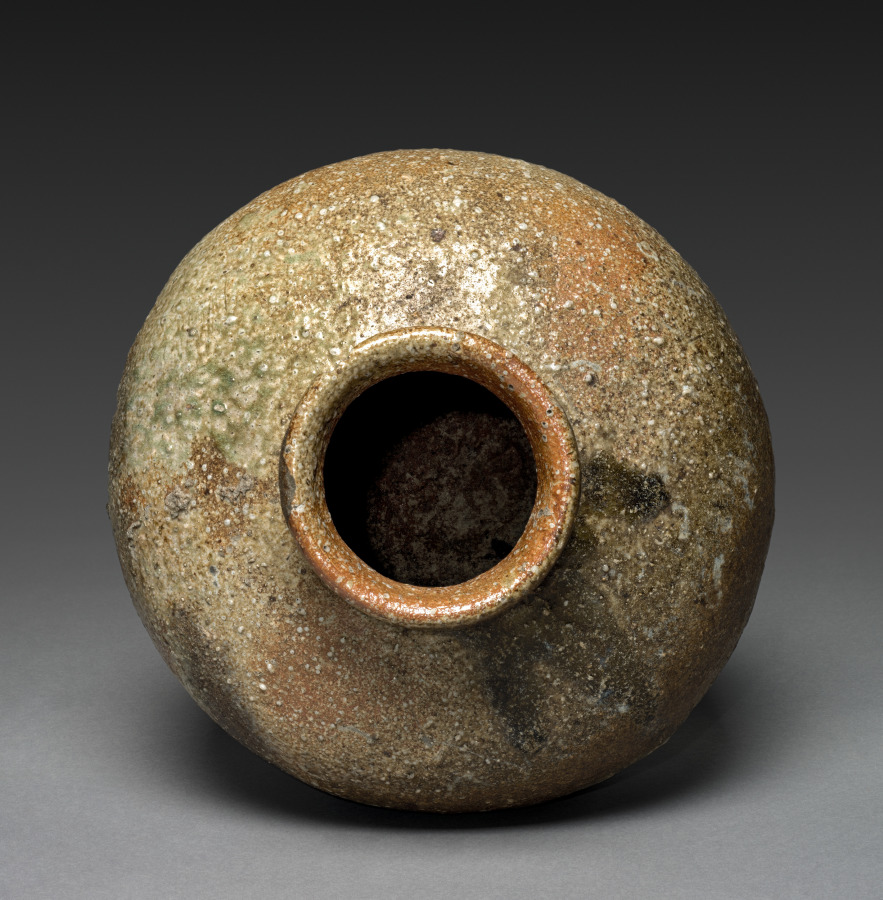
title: Storage Jar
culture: Japan, Muromachi period (1392–1573)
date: 1500s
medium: Stoneware with natural ash glaze (Shigaraki ware)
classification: Ceramic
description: Shigaraki ware is produced in the Shigaraki area of Shiga prefecture to the east of Kyoto in the Kansai region. The clay from Shigaraki has a warm orange color. When fired in an anagama kiln, a type of wood-fired kiln that uses the oxidization process, the free flow of air allows for the appearance of the ash and mineral glazes that characterize the works. Shigaraki storage jars like this one, a tsubo, have been popular for storing tea leaves since the Muromachi period.